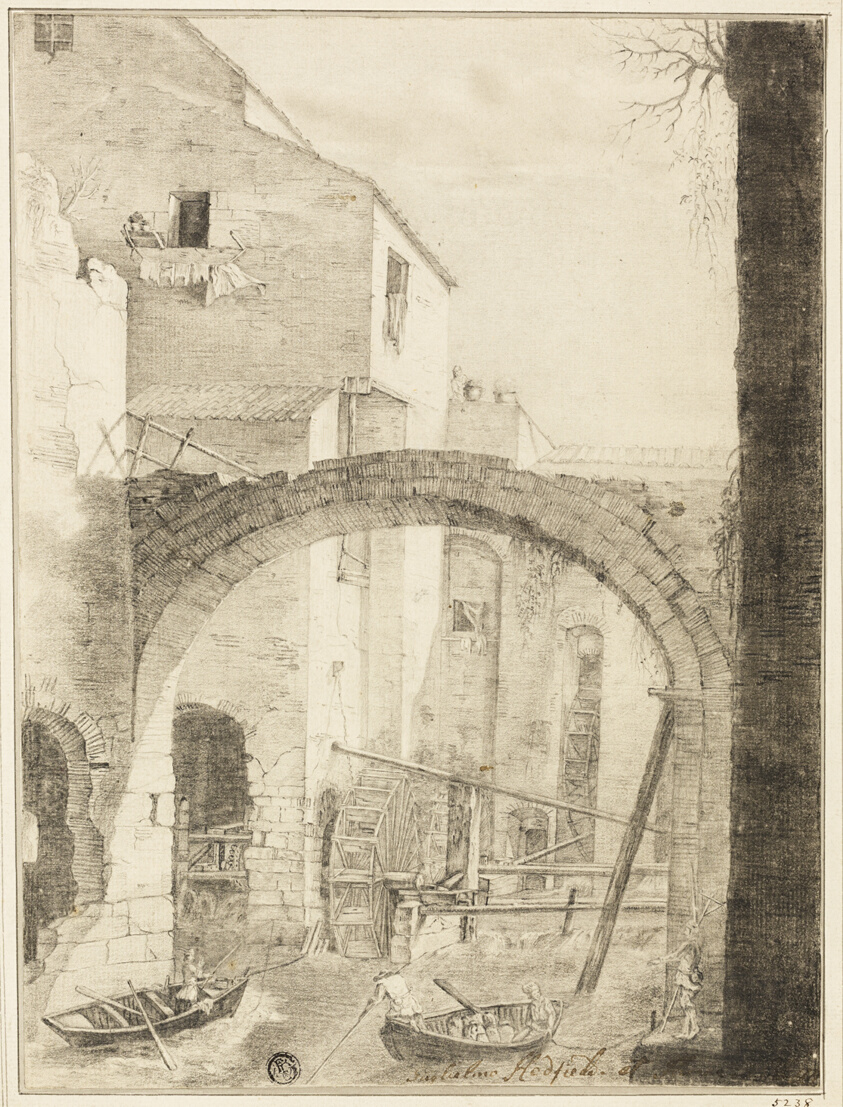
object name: Drawing and Watercolor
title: City Canal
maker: George Hadfield (American, born England, c. 1767-1826)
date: 1778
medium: Black chalk and crayon, on ivory laid paper, laid down on ivory laid paper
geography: United States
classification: chalk; drawings (visual works); prints and drawing